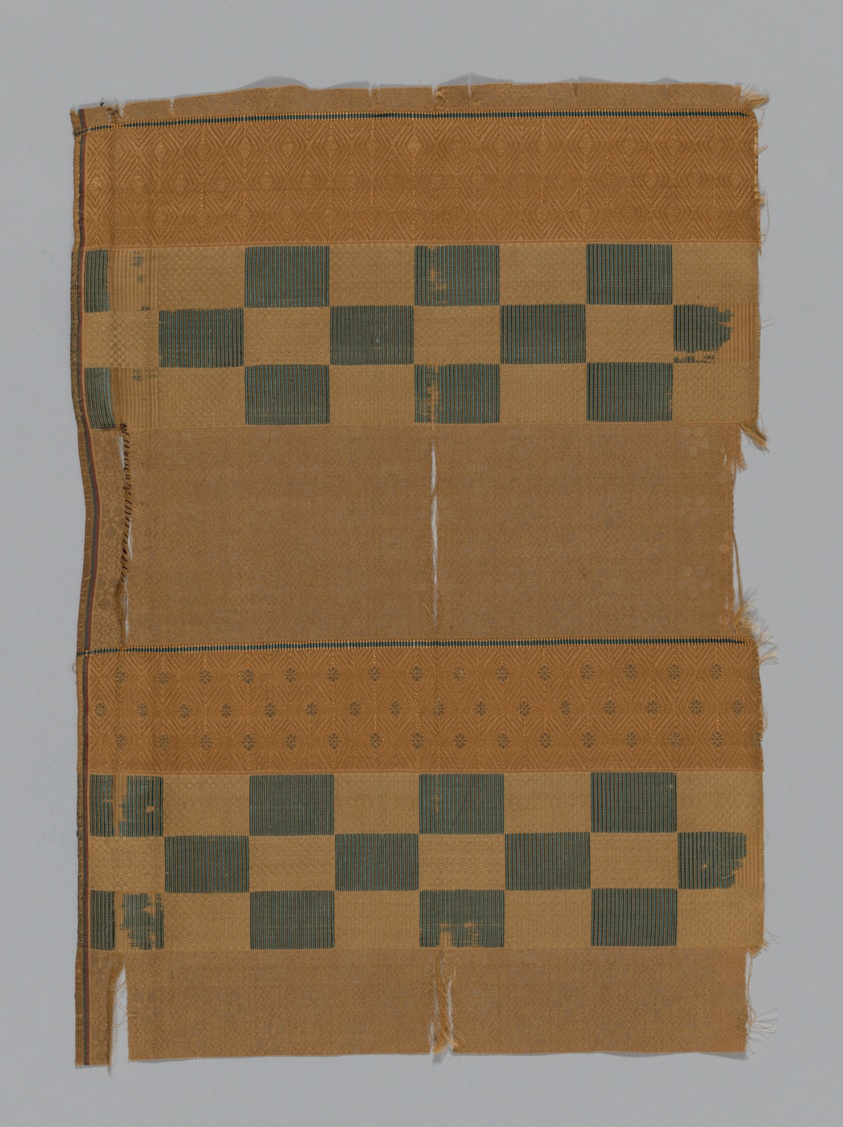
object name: Textile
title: Fragment (From a Noh Costume)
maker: Japan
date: Edo period (1615–1868), 17th century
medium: Fancy compound satin, silk and gilt and silvered paper; 2-3 strips to m.m.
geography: Japan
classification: textile; weaving